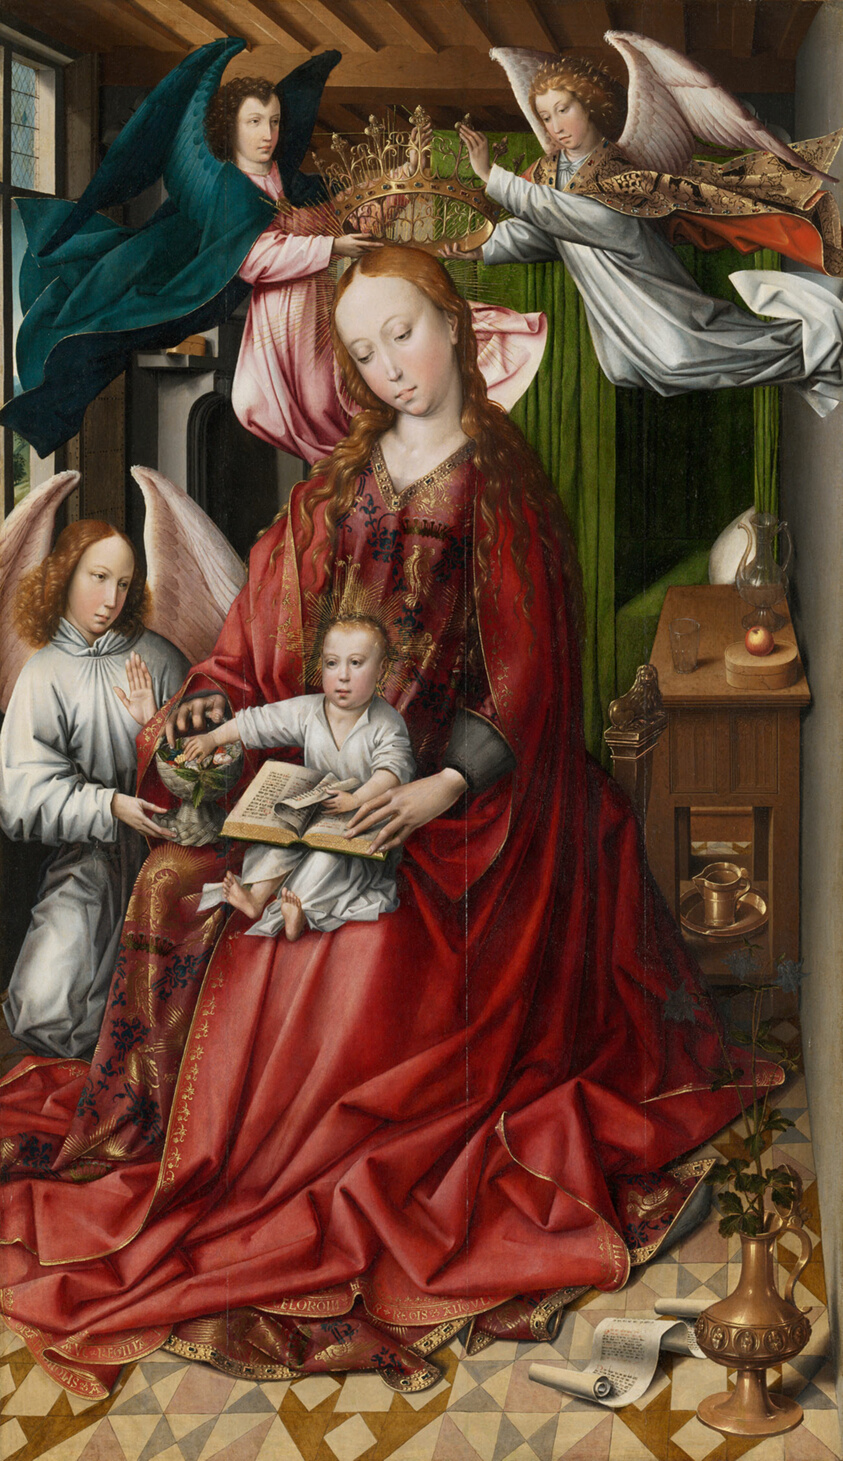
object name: Painting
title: Virgin and Child Crowned by Angels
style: 15th century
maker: Colijn de Coter (Netherlandish, c. 1450– by 1540)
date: c. 1490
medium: Oil on panel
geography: Belgium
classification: oil on panel; oil on board; paint; painting; european painting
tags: Century of Progress, Throne, lions, red (color), lilies, basin, washbowls, green (color), curtains, scrolls (motifs), bed, flowers, interior, angels, Jesus, Virgin Mary, Virgin and child/Madonna and child, world's fairs, Chicago World's Fairs